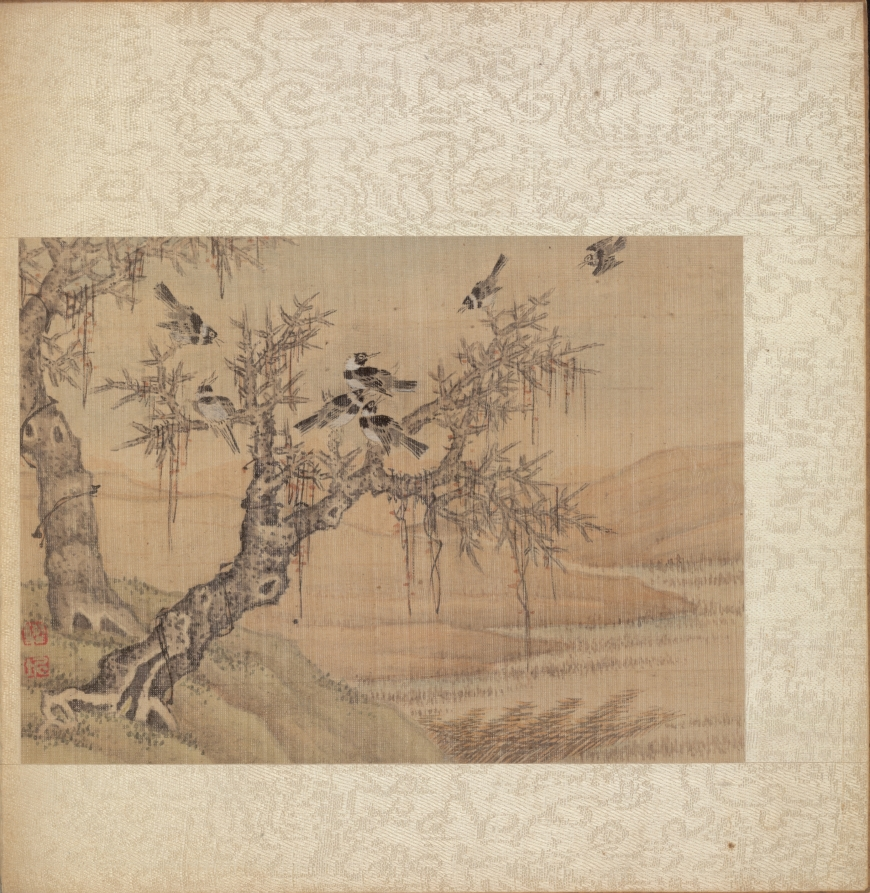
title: Album of Miscellaneous Subjects, Leaf 9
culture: China, Qing dynasty (1644-1911)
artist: Fan Qi (Chinese, 1616–after 1694)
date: early 1650s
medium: album leaf, ink and color on silk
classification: Painting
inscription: Artist seal: Fan Qi 樊圻. Poem by Zhou Yi 周儀 (mid 17th century–about 1705): Ancient trees share the slanting rays of the setting sun/ Chilly ravens hover round their branches/ The leader of the flock thinks this is a good place to rest,/ Evening being the time for returning./ This flock is the so-called a filial crow,/ Who, in disgorging their food [to feed their young], have compassionate hearts,/ Were the people in the world all like this,/ Fine talent would be everywhere.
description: Leaf 9 Zhou Yi's colophon reads: Ancient trees share the slanting rays of the setting sun. Chilly ravens hover round their branches. The leader of the flock thinks this a good place to rest, Evening being the time for returning. This flock is the so-called filial crow, Who, in disgorging their own food [to feed the young], have compassionate hearts. Were the people in the world all like this, Fine talent would be everywhere.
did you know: The winter landscape turns ocher at dusk, and the birds roost for the night.